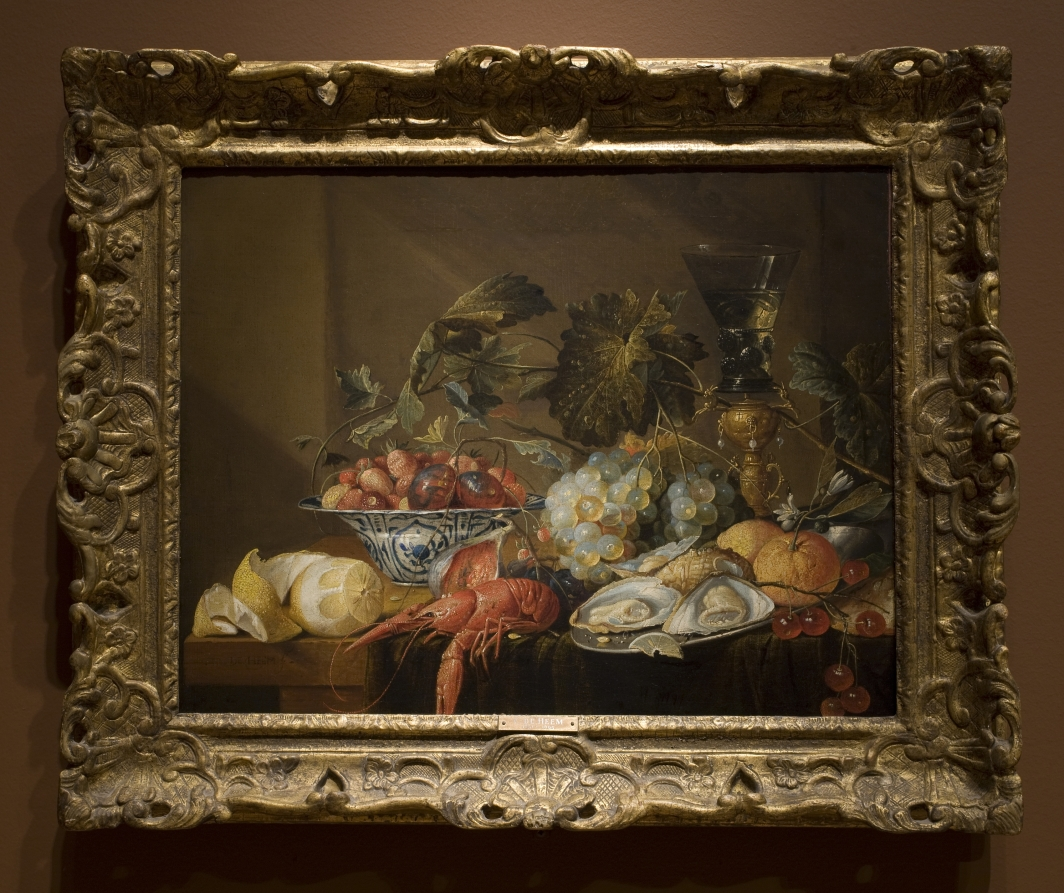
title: Still-Life with Crayfish, Oysters, and Fruit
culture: Flanders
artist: follower of Cornelis de Heem (Flemish, 1631–1695)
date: late 1600s or early 1700s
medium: oil on canvas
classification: Painting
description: The porcelain bowl in this painting most likely came from China. Political turbulence in China effectively eliminated ceramic imports to the West by the 1640s, so the bowl would have been considered at least as valuable as the gold object on the table.